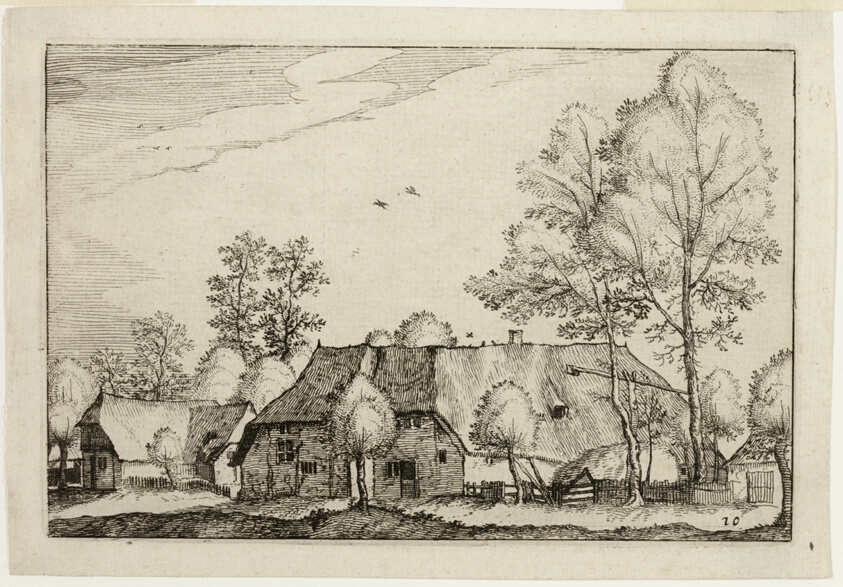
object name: Print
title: Large Farm, plate ten after Pictures of Farms, Country Houses and Rustic Villages (Praediorum villarum et rusticarum casularum icones)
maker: Claes Jansz. Visscher (Dutch, 1587-1652); after Unknown Flemish Artist, misidentified as Pieter Bruegel, the elder (Flemish, 1525/30-1569)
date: 1612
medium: Etching in black on ivory laid paper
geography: Flanders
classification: etching; print; prints and drawing